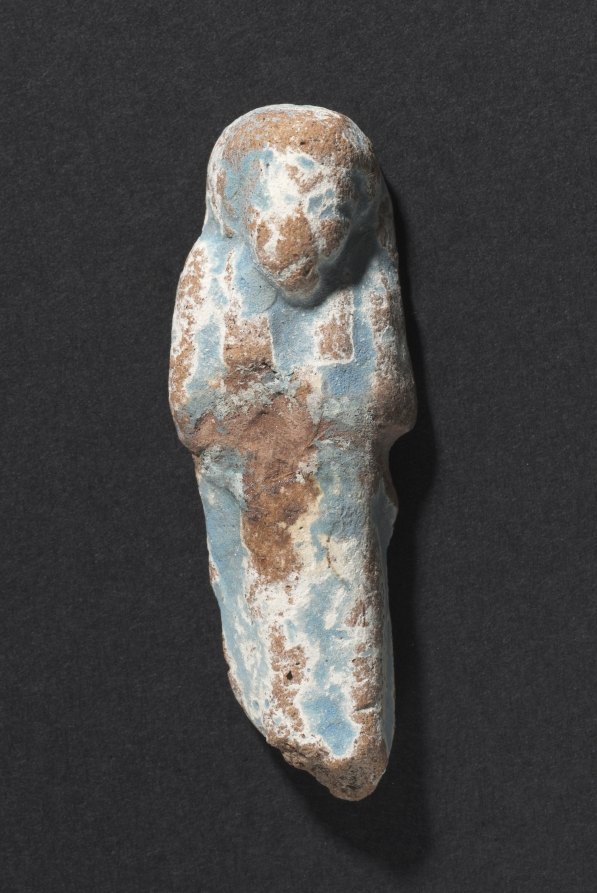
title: Shawabty of Ditamenpaankh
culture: Egypt, Late period (715–332 BCE), Dynasty 25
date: 715–656 BCE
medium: terracotta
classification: Funerary Equipment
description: High demand for shawabtys in the Late Period, a time when as many as 400 or more shawabtys were placed in the tomb with the deceased, gave rise to a specialized container for storing them: the shawabty box. This example is inscribed for the lady of the house, Ditamenpaankh, and was probably one of a pair originally made for her. The single-masted boat on the box's lid is perhaps an allusion to the pilgrimage of the deceased to the holy city of Abydos, the cult city of Osiris, king of the dead. The shawabtys inside are crude, mass-produced examples cast in an open mold. Made of terracotta, their blue paint imitates more costly shawabtys made of faience. As for the shawabty spell, it has been removed from its traditional location on the shawabty's front and relocated onto the sides of box, where it needed only to be written once, thus expediting production.